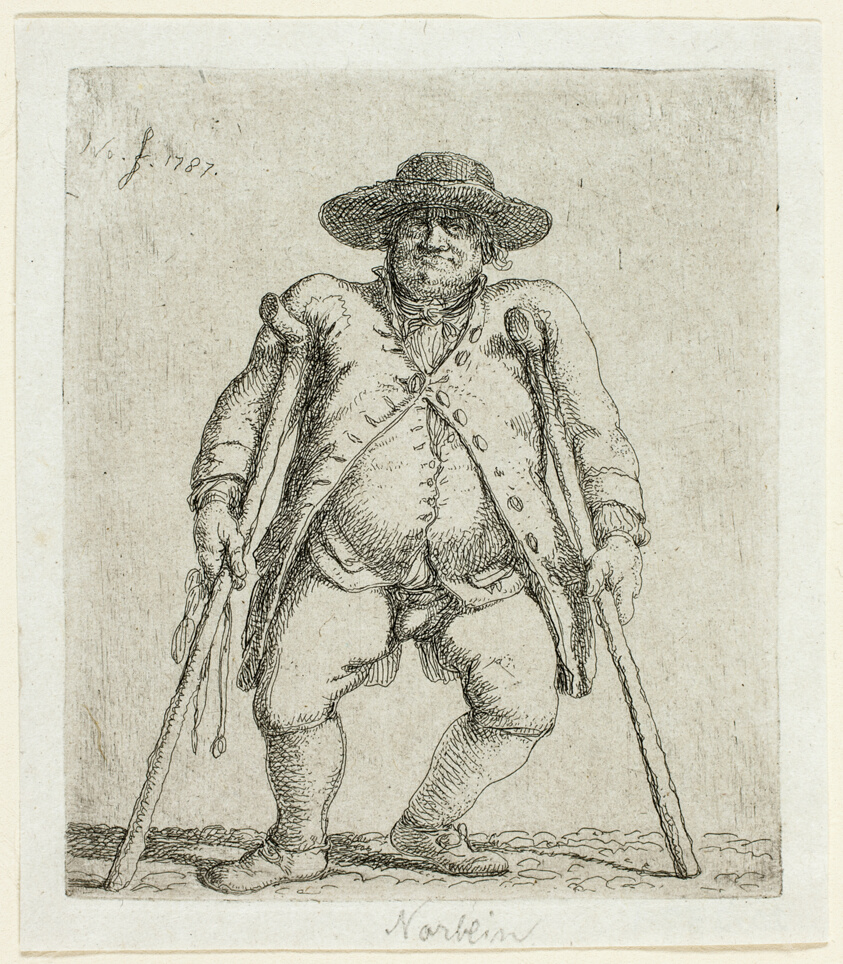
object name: Print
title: Beggar Man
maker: Jean Pierre Norblin De La Gourdaine; French, 1745-1830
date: 1787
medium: Etching in black on ivory China paper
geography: France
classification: etching; print; prints and drawing